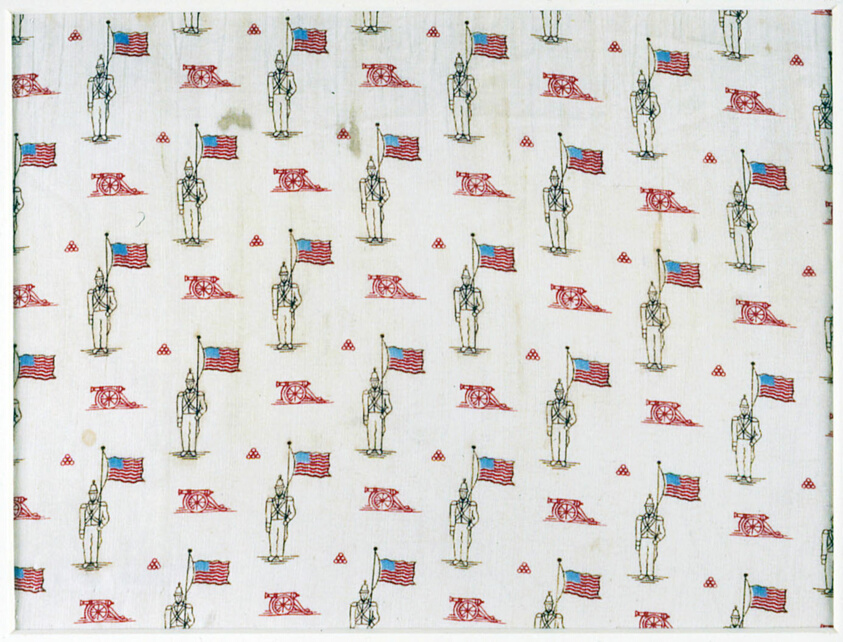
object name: Textile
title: Fragment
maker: United States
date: 1876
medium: Cotton, plain weave; roller printed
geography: United States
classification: textile; weaving - printed; furnishing textile